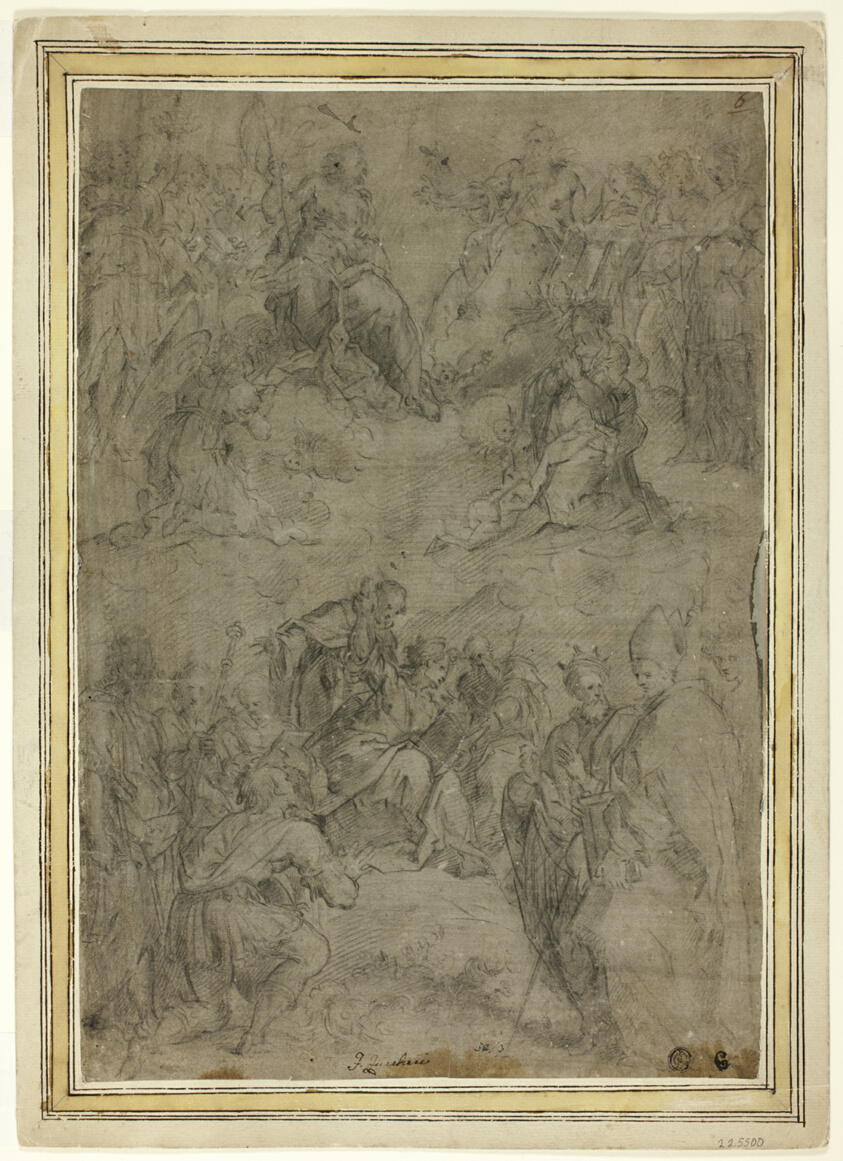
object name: Drawing and Watercolor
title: Trinity with the Virgin, and Ten Saints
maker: Tommaso Manzuoli, called Maso da San Friano; Italian, 1531-1571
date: c. 1565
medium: Black chalk, heightened with touches of white chalk, on greenish gray prepared laid paper, laid down on ivory laid card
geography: Italy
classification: chalk; drawings (visual works); prints and drawing